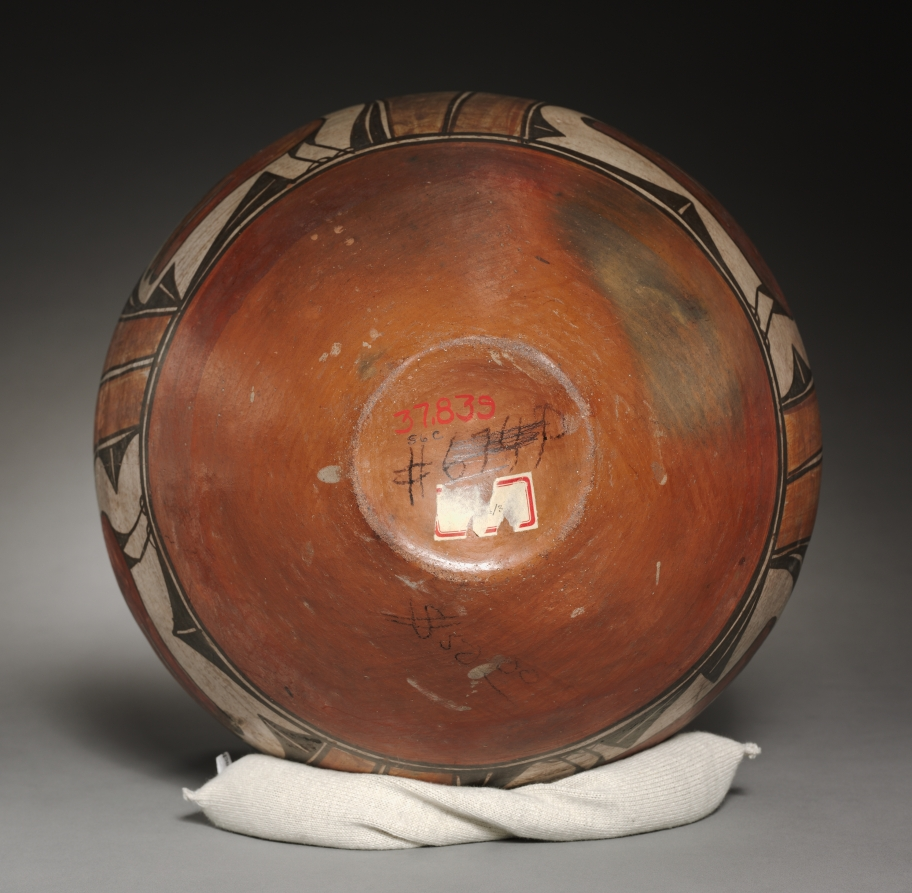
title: Water Jar/ Olla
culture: Southwest, Pueblo, Zia, Post- Contact Period, 20th century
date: 1900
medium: ceramic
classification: Ceramic